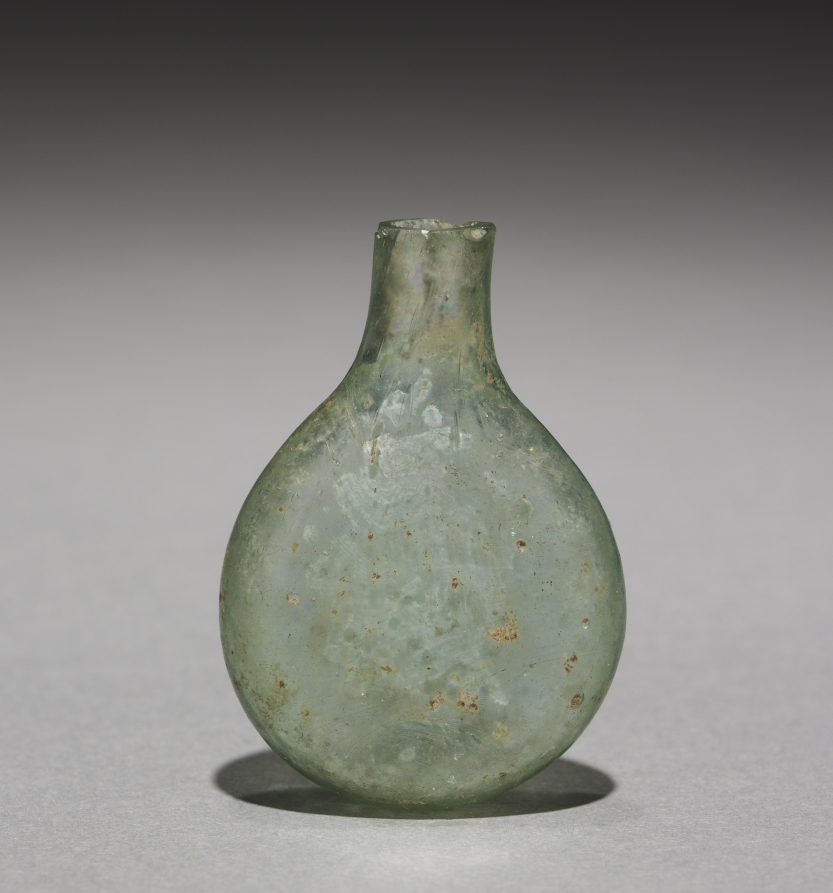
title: Pilgrim's Flask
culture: Byzantium, Syria-Palestine, 6th-7th century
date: 500–700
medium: green glass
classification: Glass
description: Ampullae (small flasks) from pilgrimage sites were made of metal, terracotta, or glass. Because of their fragility, glass ampullae survive less abundantly than the other materials.